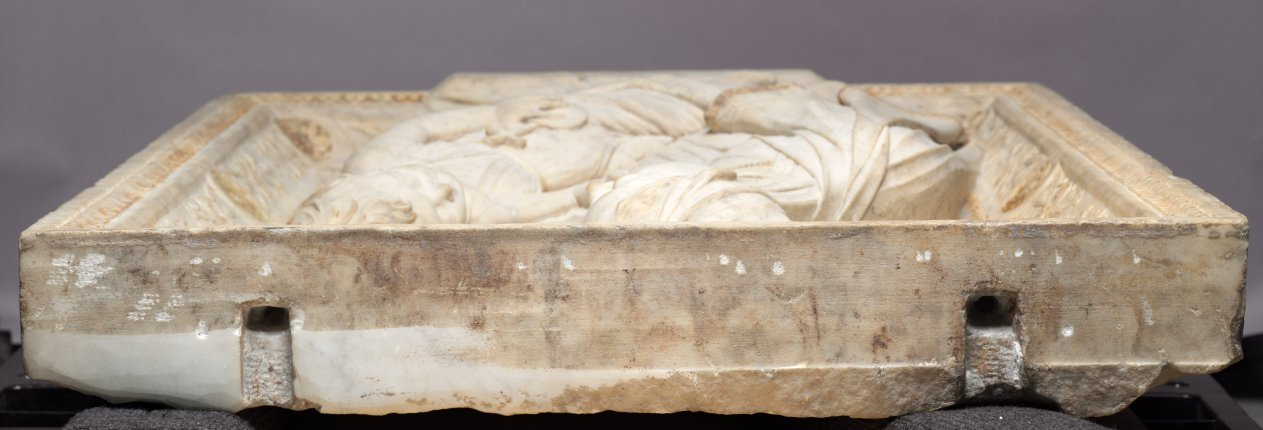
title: Madonna and Child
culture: Italy, Rome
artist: Mino da Fiesole (Italian, c. 1430–1484)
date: by 1461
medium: marble with traces of gilding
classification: Sculpture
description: This relief is one of four produced for the ciborium (canopy) erected by Cardinal Guillaume d'Estouteville over the high altar of the church of Santa Maria Maggiore in Rome. The ciborium was taken apart in 1747 and the other three panels--Christ Blessing, The Annunciation, and Saints Peter and Paul--were set into the walls of the sacristy.